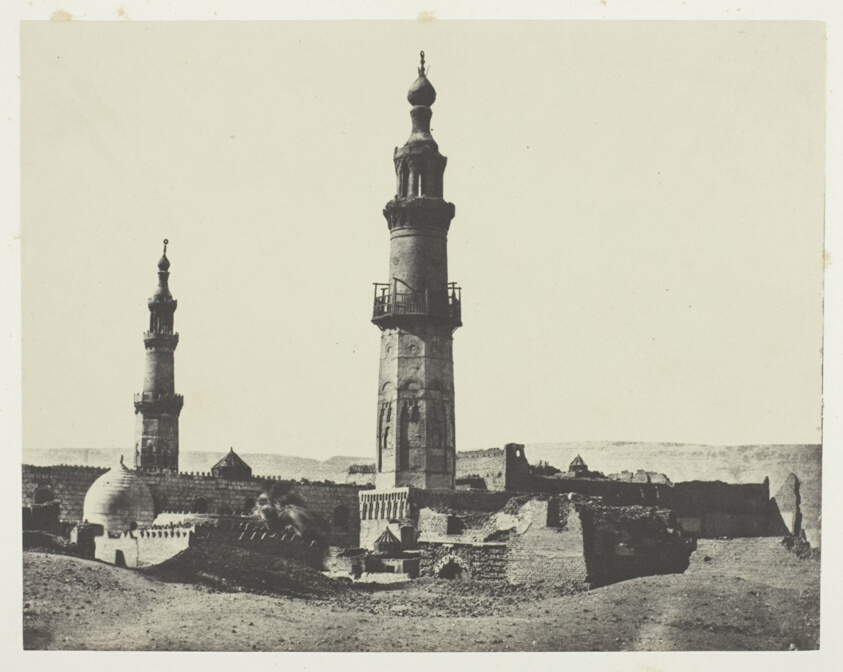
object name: Photograph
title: Mosquée d'Aly-Bey, Girgeh, Haute-Egypte, plate 15 from the album "Egypte, Nubie, Palestine et Syrie" (1852)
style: 19th century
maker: Maxime Du Camp (French, 1822–1894)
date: 1849/51, printed 1852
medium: Salted paper print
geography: France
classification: salted paper print; photographic process; photography; photograph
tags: Collected by Hugh Edwards, Egypte, Nubie, Palestine et Syrie